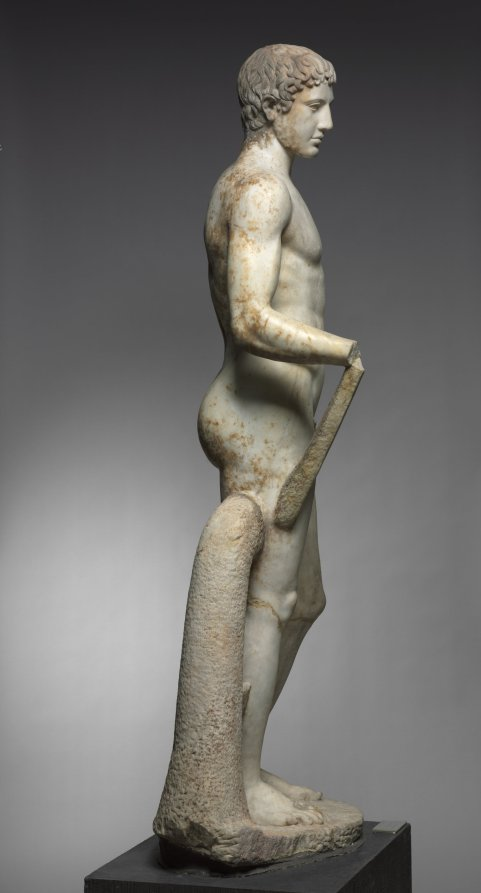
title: Statue of an Athlete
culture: Italy, Roman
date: 1–100 CE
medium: marble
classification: Sculpture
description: This idealized athlete recalls Greek sculptural types invented and popularized during the 400s BC. Large-scale athletes and other sculptures like this were originally created by famous artists as sanctuary dedications. Centuries later, they were widely copied and adapted by Roman sculptors, whose clients sought their own versions of earlier masterpieces. Working in marble rather than bronze, these sculptors added certain elements for stability, such as the struts and the large tree trunk beside the right leg here. Sculptures like this one are profoundly complex, made by and for Romans but descended from Greek ancestors.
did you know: For many years, this sculpture stood in the rotunda of the Cleveland Museum of Art.